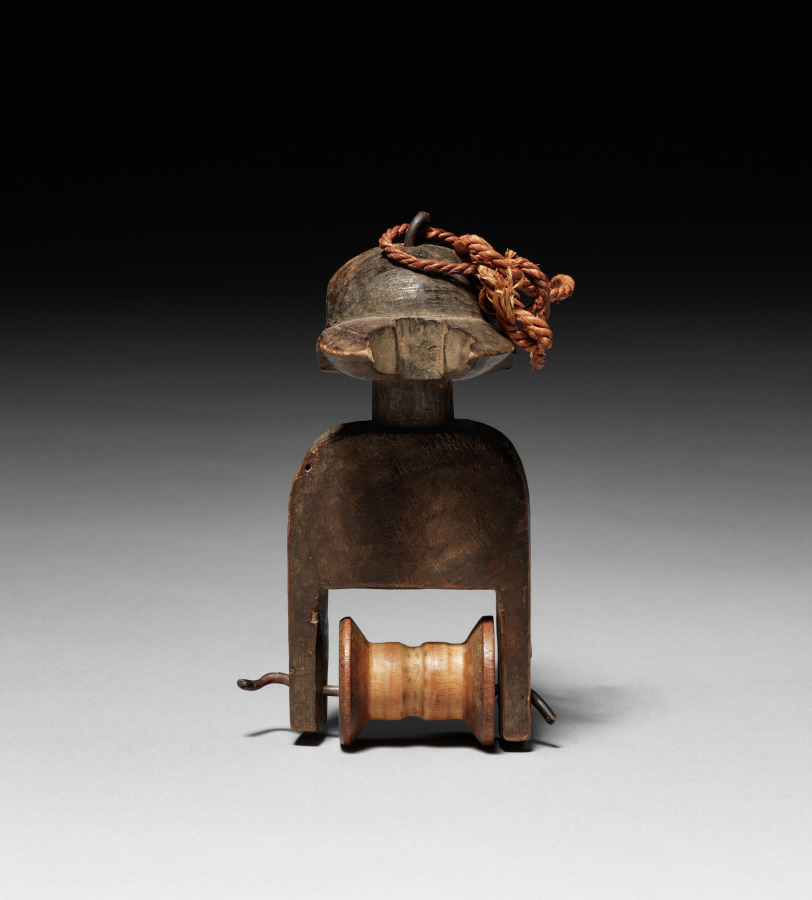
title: Heddle Pulley (Bo Nun Amuin mask)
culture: Africa, West Africa, Côte d’Ivoire, Baule-style carver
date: 1900s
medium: Wood, metal, and plant fiber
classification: Implements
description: The heddle pulley, a working element of a narrow-band loom, bears a miniature sculpture. Heddle pulleys support and separate threads during weaving. Mounted above the weaver, the pulleys allow him to glance up at an object of inspiring beauty, rather than pure functionality. This pulley depicts a face mask, a secular usage of a typically sacred mask type.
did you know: This heddle pulley depicts a fearsome Bo Nun Amuin mask that recalls nature spirits.